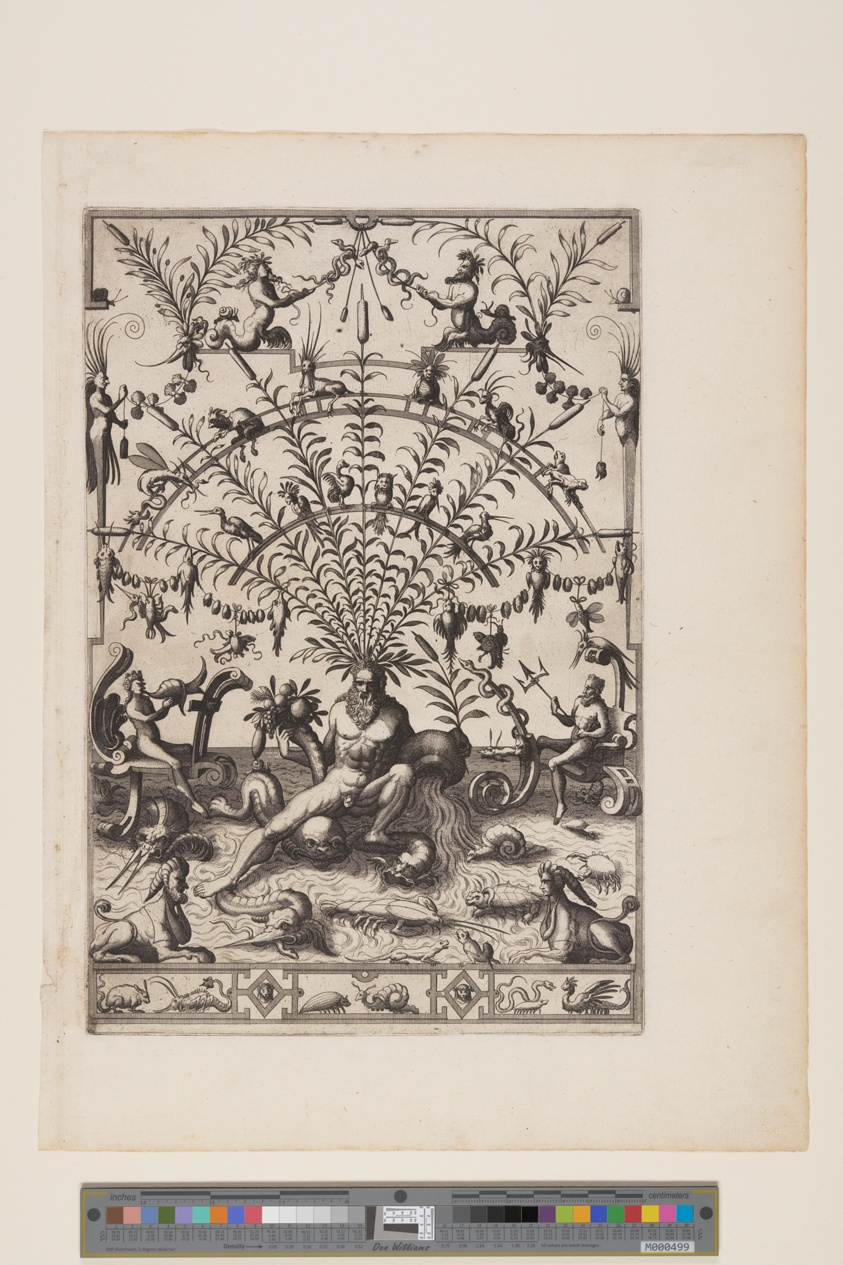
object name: Print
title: River God with Cornucopia and Stone Jar, from Veelderleij niewe inventien...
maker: Johannes van Doetecum (Netherlandish, 1528/32–1605) and Lucas van Doetecum (Dutch, died before 1584); after Cornelis Floris (Flemish, 1514-1575)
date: 1557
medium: Etching on ivory laid paper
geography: Netherlands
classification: print; paper; prints and drawing; etching